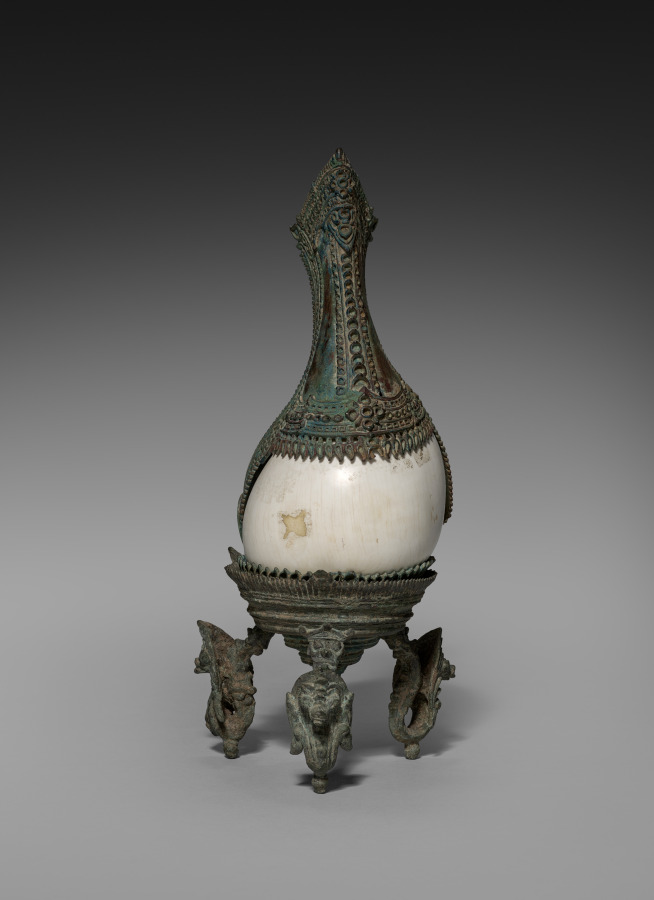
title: Conch Shell with a Figure of Hevajra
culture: Cambodia, Khmer, Angkor Period, 12th-13th Century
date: 1100s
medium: shell and bronze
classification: Sculpture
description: A royal temple like Banteay Chhmar was built for performing rituals and to honor images of gods, Buddhas, and other sacred or enlightened beings for the sake of the kingdom’s protection and ongoing prosperity. Conch shells were blown at the start of rituals to make the sound corresponding to the syllable om. The dancing figure of Hevajra, a Buddhist being of enlightenment with eight heads, sixteen arms, and four legs, has been worked into the bronze embellishment of the shell. Hevajra was elevated to a prominent position in Khmer Buddhism of the Angkorian period as the standard figure denoting the practice of rituals prescribed in a text called the Hevajra-tantra. The tripod stand with three serpents is probably not original to the shell.